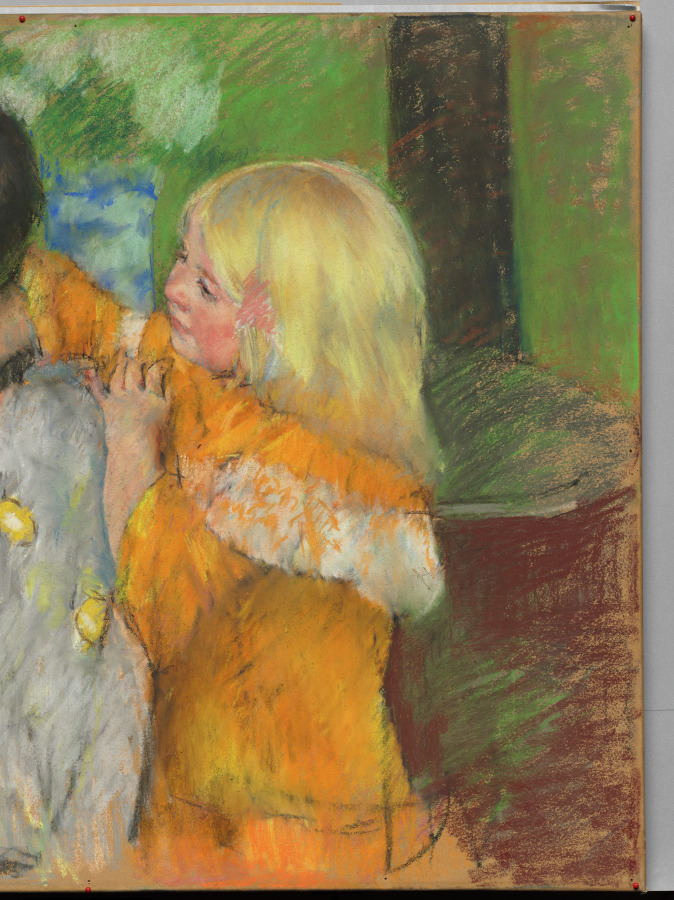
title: After the Bath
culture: America, late 18th-19th Century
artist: Mary Cassatt (American, 1844–1926)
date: 1901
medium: pastel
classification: Drawing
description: Mary Cassatt began using pastel in the 1870s and continued to experiment with the medium throughout her career. This drawing depicts a mother and child, one of the artist's preferred subjects. Cassatt typically used the technique seen here, in which she finished her sitters' faces with a high degree of detail but rendered the rest of the composition in a much looser and sketchier style.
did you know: Mary Cassatt once commented that pastel was "the most satisfactory medium for [portraying] children," since they could not sit still for long and the medium allowed for rapid sketching.